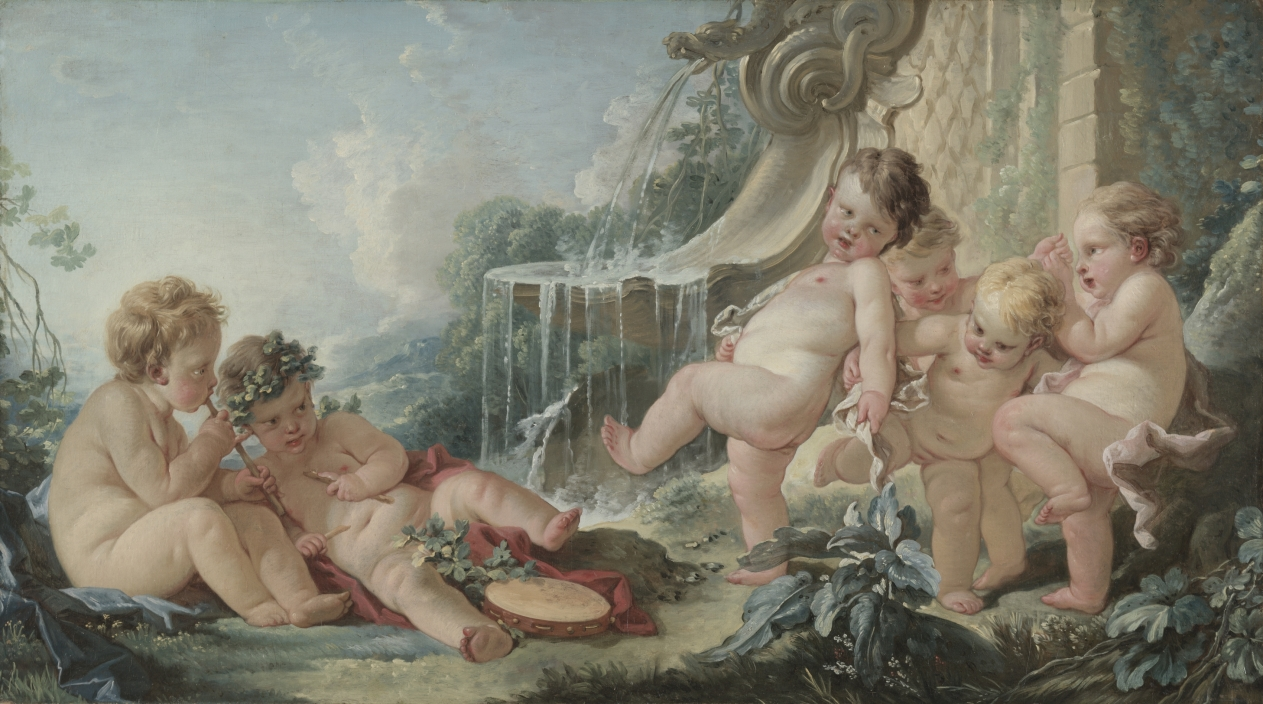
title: Music and Dance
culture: France, 18th century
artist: François Boucher (French, 1703–1770)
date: 1740s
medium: oil on canvas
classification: Painting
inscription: Signed lower left: "f Boucher"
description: Along with Cupids in Conspiracy (1948.181.2), this work is surely part of a series of over-door paintings that would have been installed in a house. However, where the panels were originally installed or who commissioned them remains unknown. They exemplify the fusion of fine arts and decorative arts that was common in elite interior design in 18th-century France. Even though the paintings were part of the wall decoration of the room, the patrons chose François Boucher, a well-known painter of portraits and genre scenes, as well as mythological and religious subjects, to execute them. These two paintings reflect a style that was popular both at court and among other wealthy patrons through much of the eighteenth century: light, charming, pastoral scenes that mix classical elements with pure fantasy. Both of them feature putti, chubby baby characters that add a touch of humor to the images.